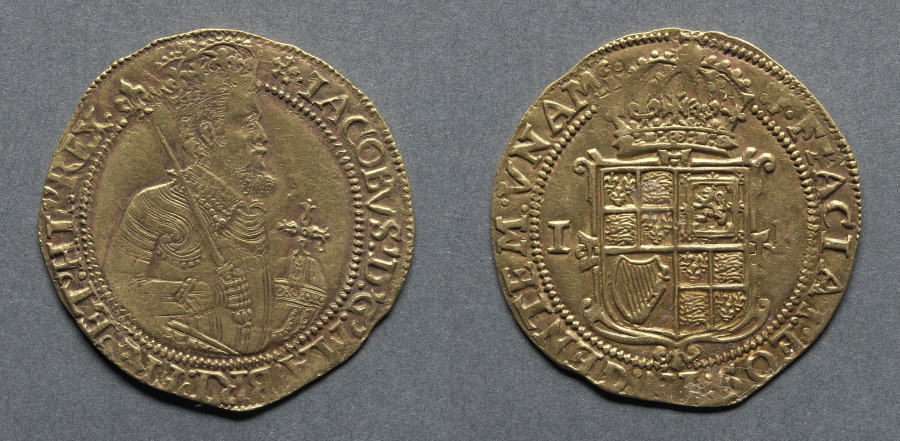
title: Unite: James I (obverse); Shield of Arms (reverse)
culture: England, James I, 1603-1625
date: 1613–15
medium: gold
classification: Coins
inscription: IACOBVS D G ANG SCO FRAN ET HIB REX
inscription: FACIAM EOS IN GENTEM VNAM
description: The unite was one of the new denominations introduced after the coinage had been down-rated by ten percent and then restored in 1611. It was so named because the accession of James I brought about the union of the thrones of England and Scotland. On the obverse the king's titles now read James by the grace of God King of England, Scotland, France and Ireland. While on the reverse is a reference to Ezekiel 37:2 in the Vulgate Bible, I Will Make Them One Nation.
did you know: The shield of Scotland shows a lion while that of Ireland is the harp.